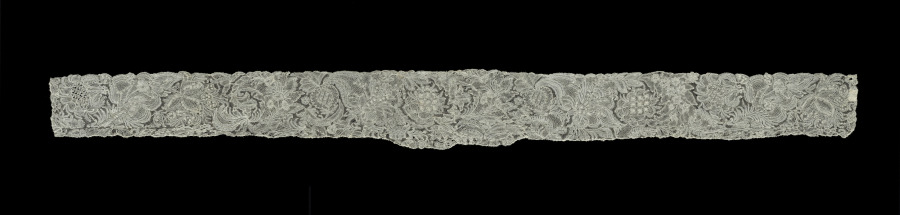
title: Lace Lappet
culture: Belgium, Brussels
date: 1700s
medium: linen: bobbin lace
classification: Lace